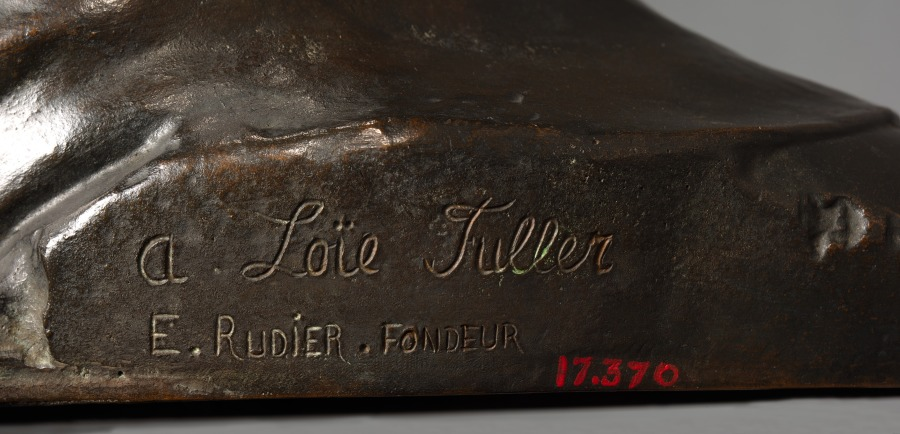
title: Mask of Napoleon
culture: Italy, 19th century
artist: C. Francesco Antommarchi (Italian, 1780–1838)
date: early 19th century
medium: bronze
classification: Sculpture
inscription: Signed on one side, inscribed on the other: "A Loie Fuller. E. Rudier, fondeur"